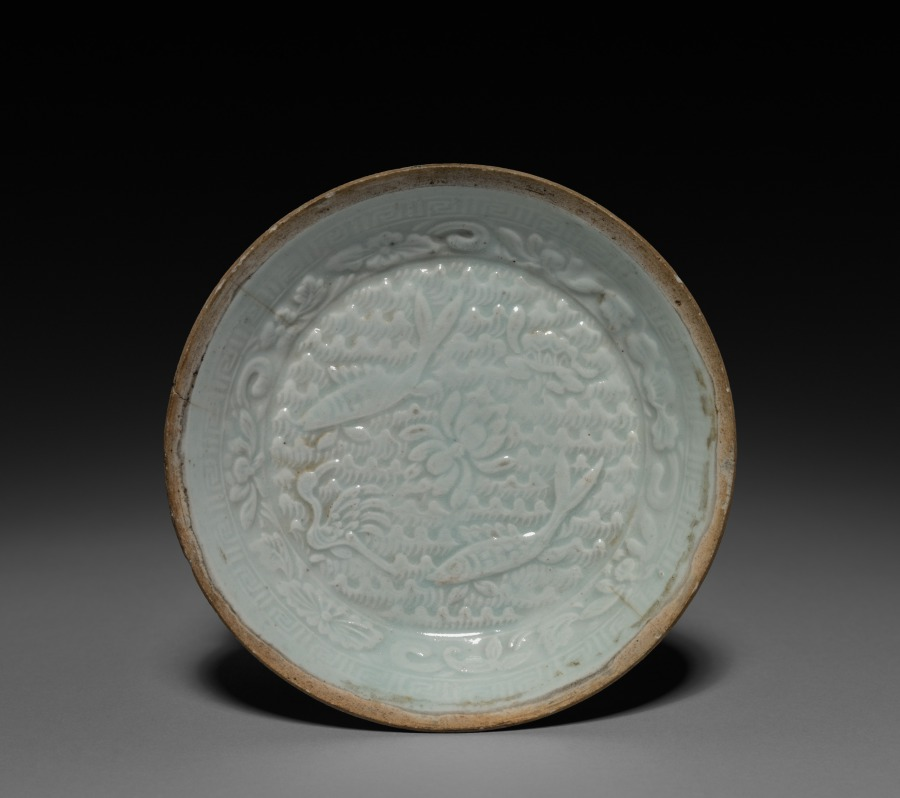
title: Saucer: Qingbai ware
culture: China, Southern Song Dynasty (1127-1279) - Yuan Dynasty (1271-1368)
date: 1200s-1300s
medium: porcelain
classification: Ceramic